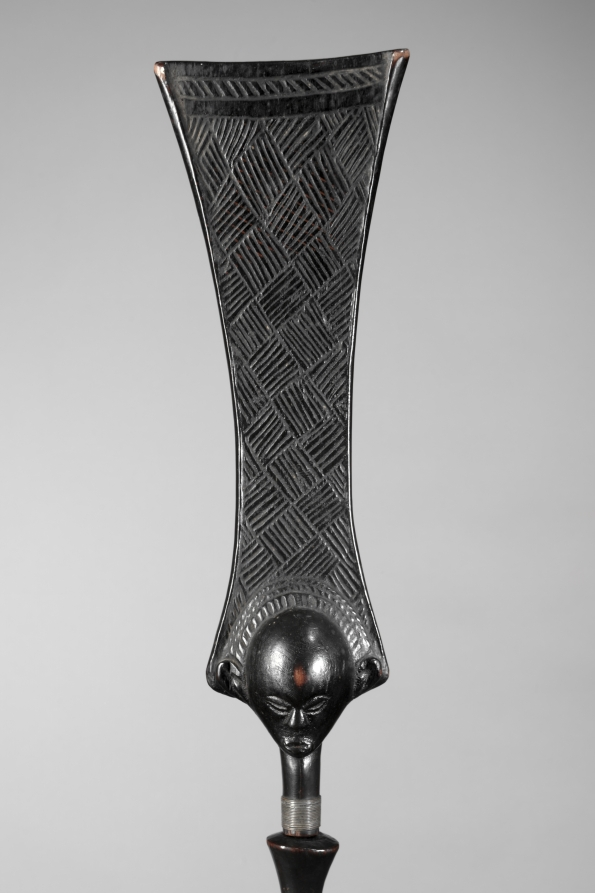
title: Staff of Office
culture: Central Africa, Democratic Republic of the Congo, Luba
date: early to mid-1800s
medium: Wood and iron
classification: Sculpture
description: Sanctified by a ritual specialist and enhanced with medicinal substances, the staff possessed supernatural qualities and was endowed with healing power. Luba staffs are among the most important regalia of Luba kings. The metal point alludes to the kingdom's stability and durability. Each staff has its own distinctive iconography to reflect regional styles. As Chief Msidi (former owner of this staff) ruled over the Yeke kingdom (and not the Luba kingdom), it begs the question of how he acquired this symbol of another realm's power.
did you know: The Yeke kingdom ruler Chief Msidi gave this as a gift of appreciation to the British missionary Frederick Stanley Arnot, whom the chief had invited to his kingdom.